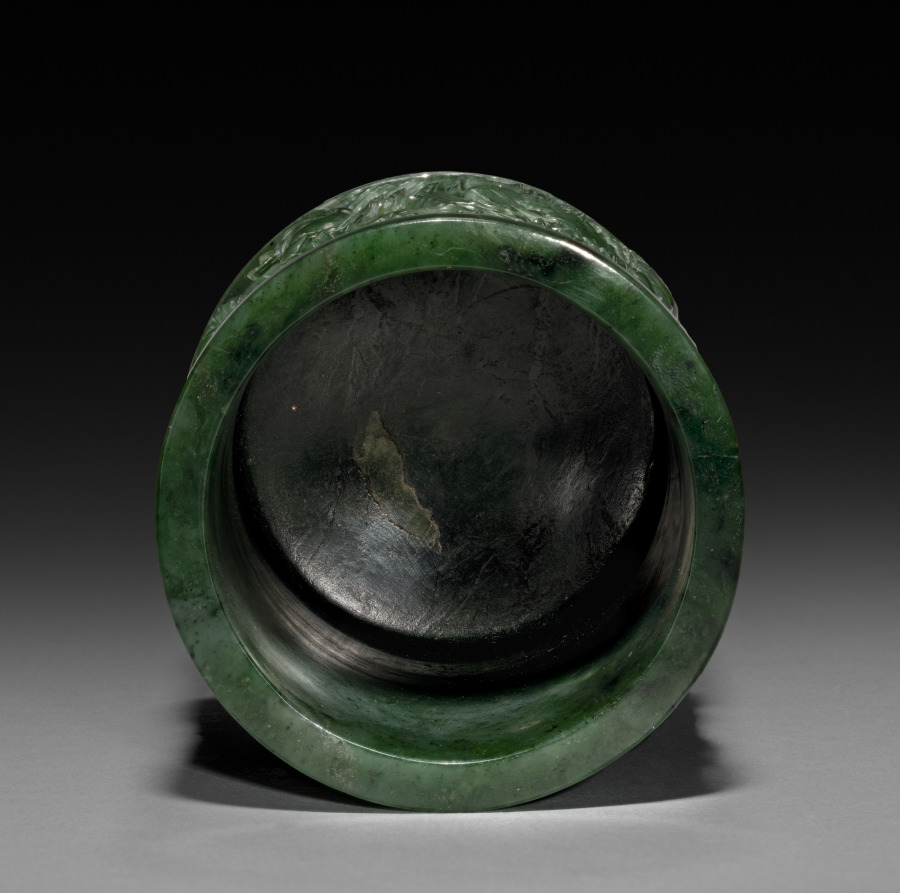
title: Brush Holder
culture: China, Qing dynasty (1644-1911)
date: 1800s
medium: spinach jade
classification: Jade